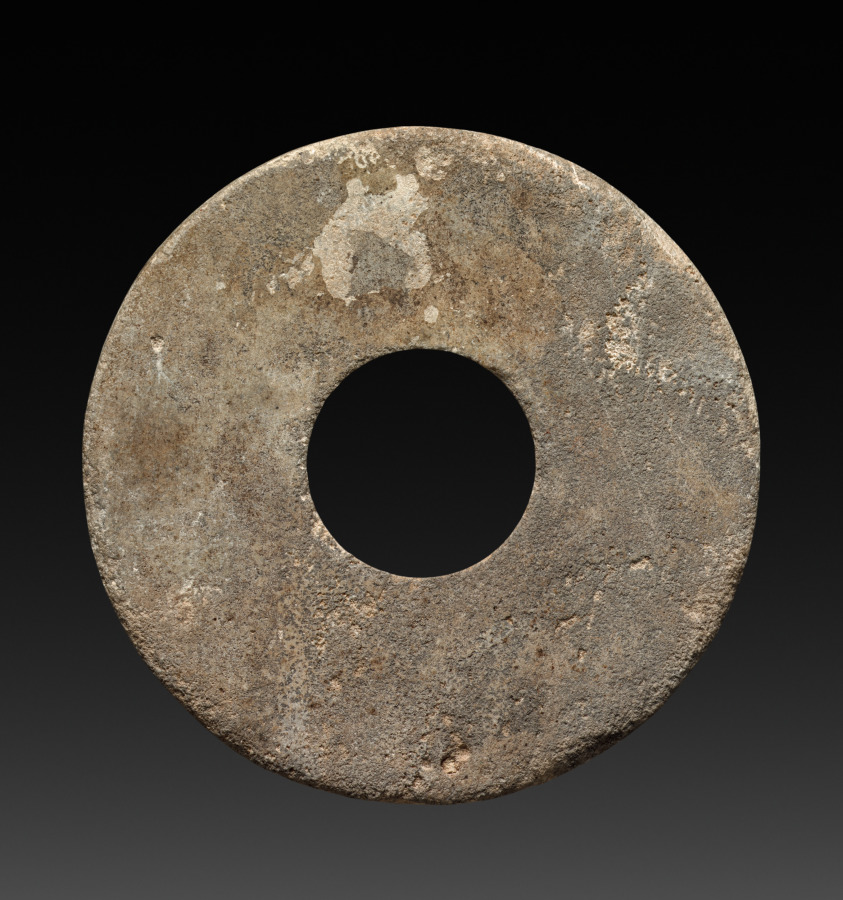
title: Ring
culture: China, Han dynasty (202 BCE–220 CE)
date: 206 BCE–220 CE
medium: jade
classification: Jade